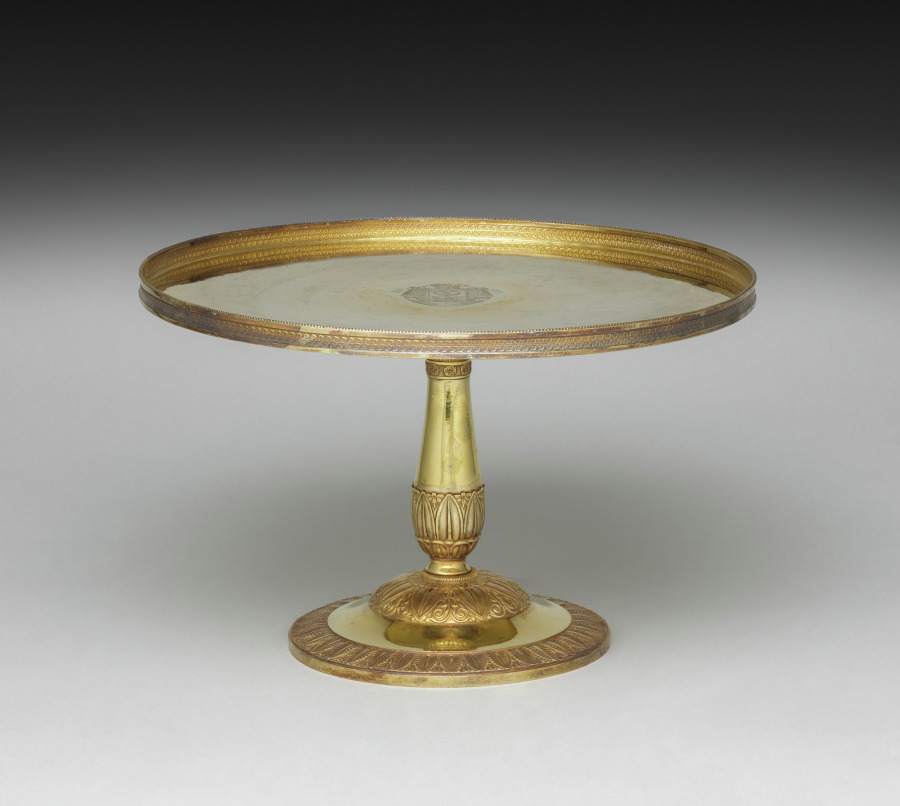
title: Tazza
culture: Italy, Rome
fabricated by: Pietro Paolo Spagna (Italian, 1793–1861)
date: c. 1815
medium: silver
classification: Silver